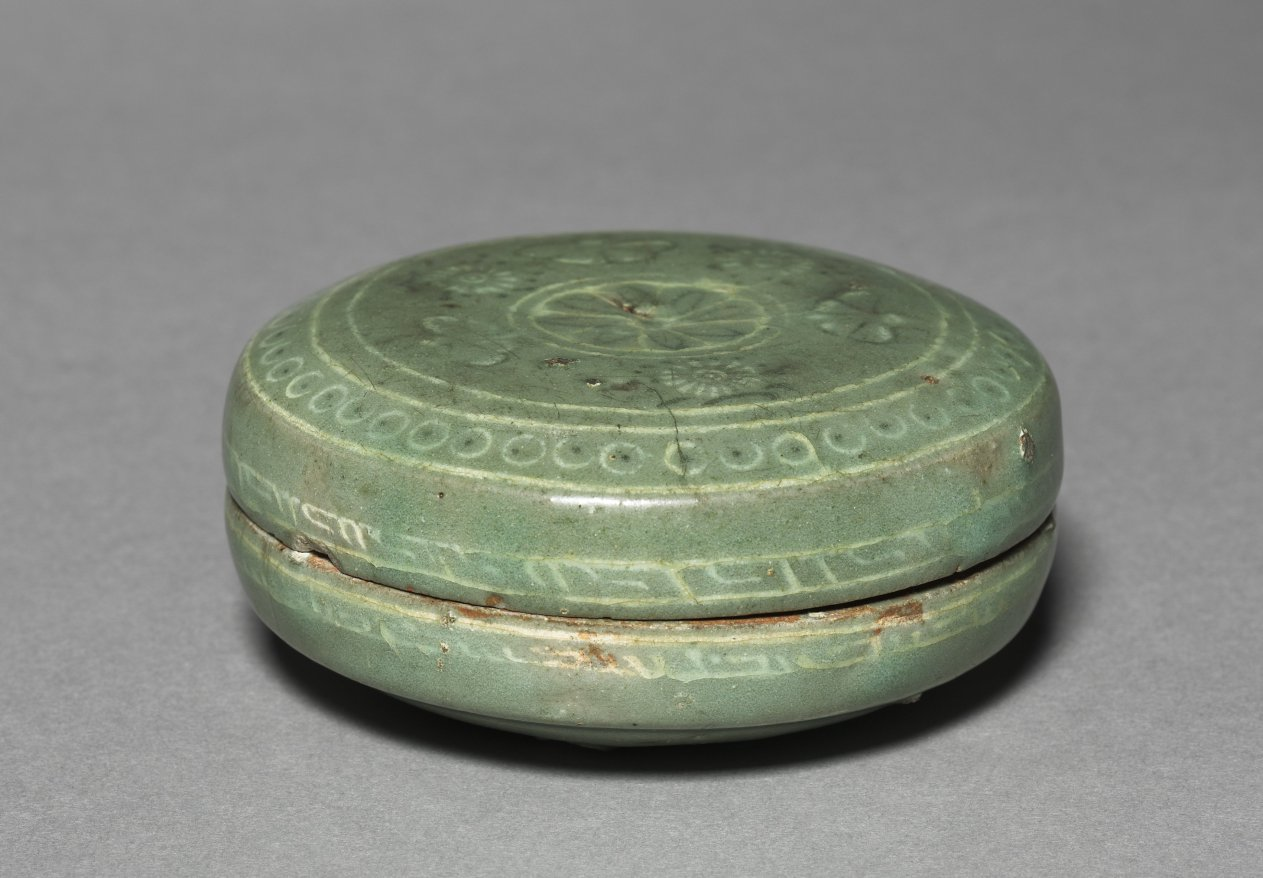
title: Box and Cover with Inlaid Chrysanthemum and Insect Design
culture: Korea, Goryeo dynasty (918–1392)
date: 918–1392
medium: Celadon with inlaid design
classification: Ceramic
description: Celadons, spoons, seals, and bronze mirrors were the most common burial objects in tombs during the Goryeo period (918–1392). Once used to contain colored powder, rouge, and eyebrow gel for makeup, this small container was one of the standard goods that furnished elites' tombs. Both women and men used the grain powder of rice or millet for whitening their skin, safflower extract for rouge, and plant ash or soot for eyebrow gel. Yet, natural-looking make-up seems to have been the most favorable one in Korean according to the travelogue by Xu Jing (1091–1153), the Chinese diplomat who visited Korea in 1123.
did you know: This ceramic container was used to store either incense or cosmetics.